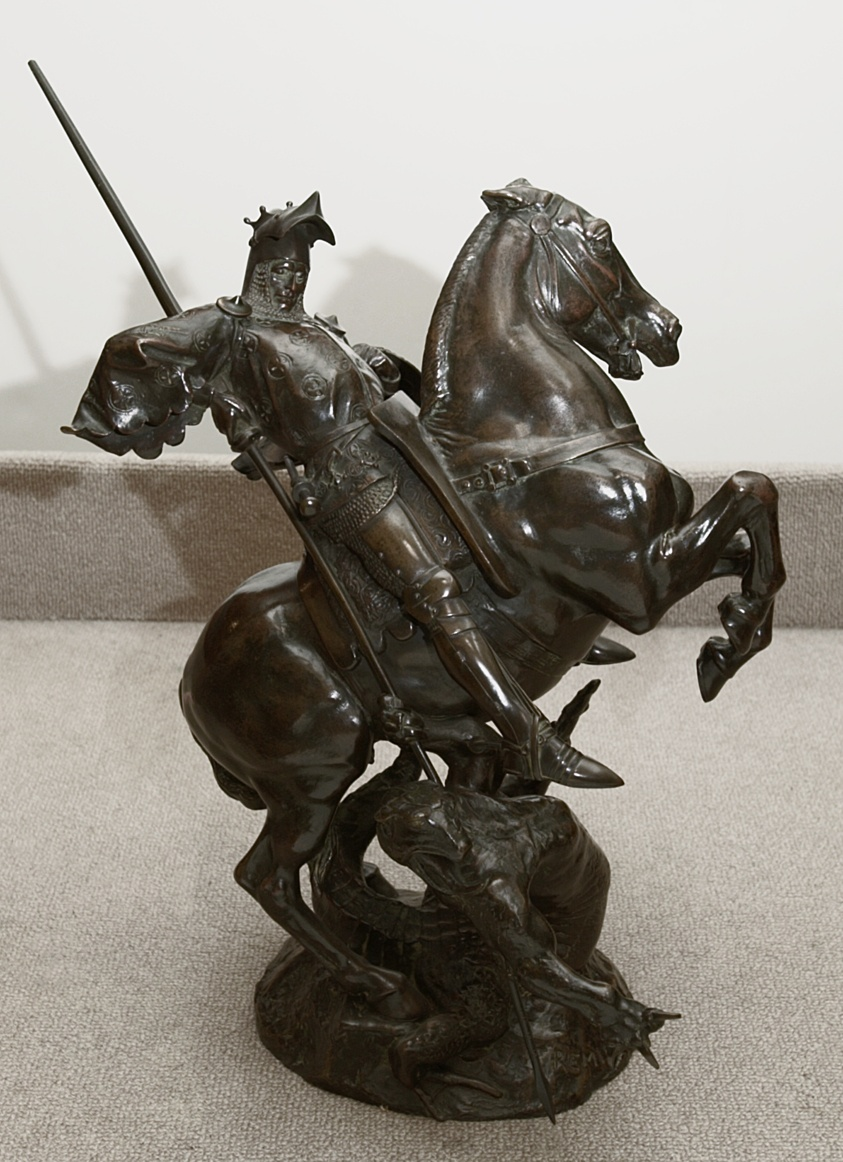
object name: Sculpture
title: Saint George Slaying the Dragon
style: nineteenth century, 19th century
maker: Emmanuel Fremiet (French, 1824–1910)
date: 1871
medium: Bronze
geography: France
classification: statuette; sculpture; french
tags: saints, knights, man, Christianity, Christian subjects, religious, religious figures, religion, sculpture, battles, helmets, armor, weapons, spears, animals, horse, dragon